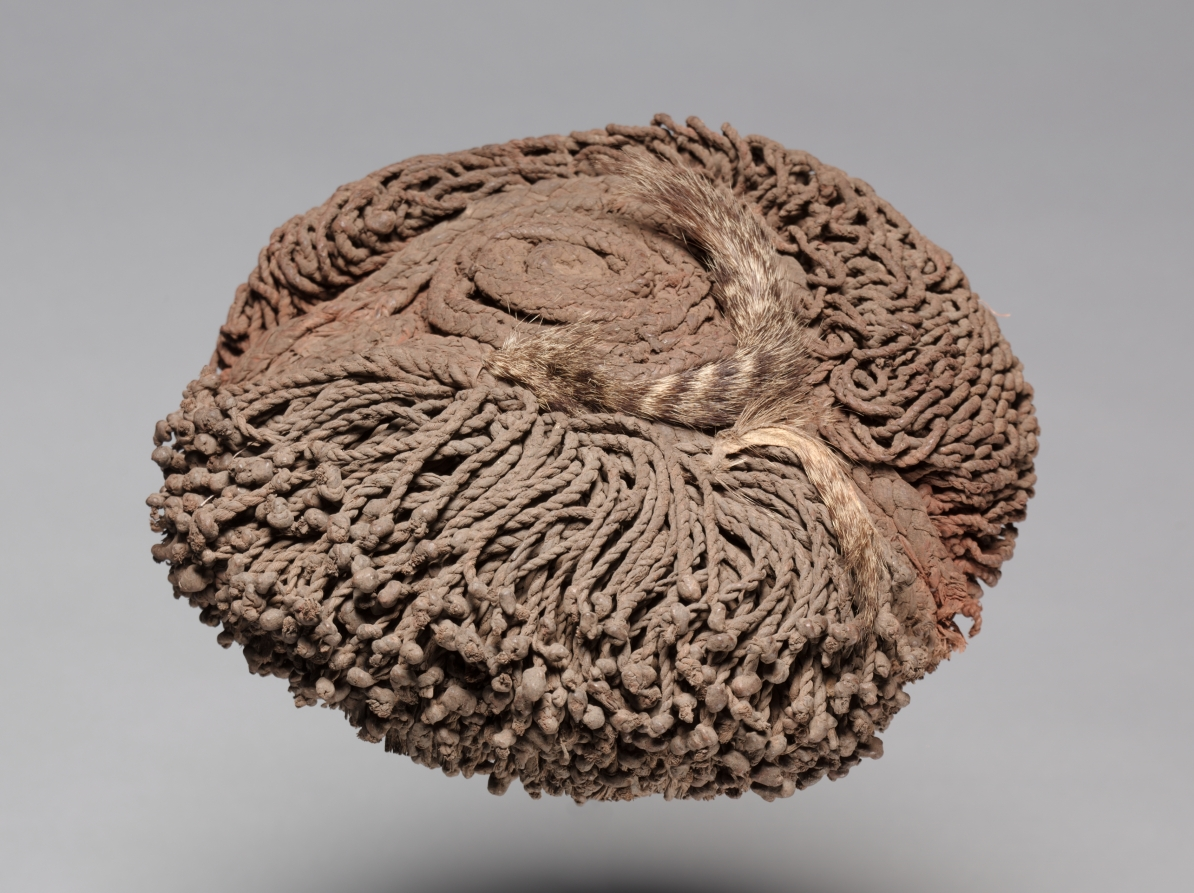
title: Wig (uyembe matota, wiyembe, or pulumba)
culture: Central Africa, Democratic Republic of the Congo or Angola, Chokwe, early to mid 20th century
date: early to mid 1900s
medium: Plant fiber, pelt, and clay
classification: Garment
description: Among the Chokwe, hats, diadems, and wigs of all sorts made in a variety of materials were once commonly worn by both men and women. Some were exclusive to religious and political titles. This wig imitates a female hairstyle in vogue until the 1960s. Made by a male craftsman, it was most typically worn by a woman at dances and other public festivals.